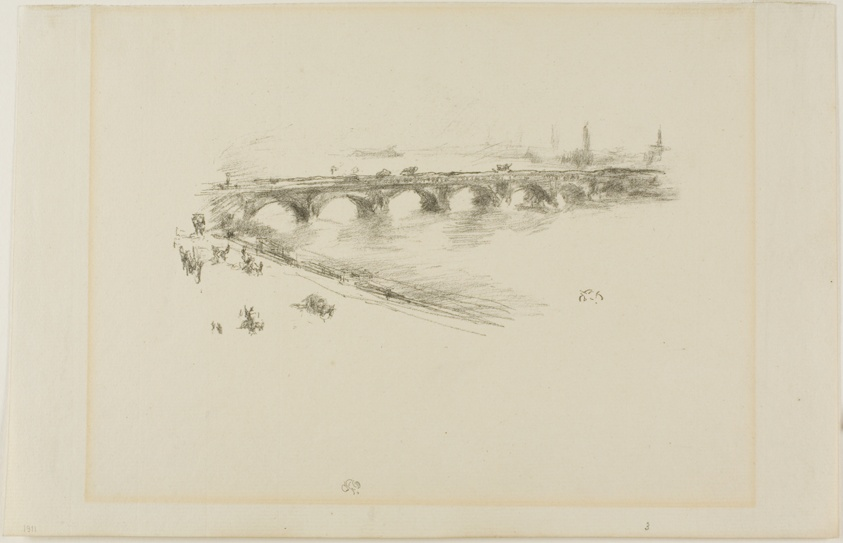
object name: Print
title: Evening, Little Waterloo Bridge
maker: James McNeill Whistler (American, 1834-1903)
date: 1896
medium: Transfer lithograph in black with stumping, on cream laid paper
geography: United States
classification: transfer lithograph; lithograph; print; prints and drawing; paper